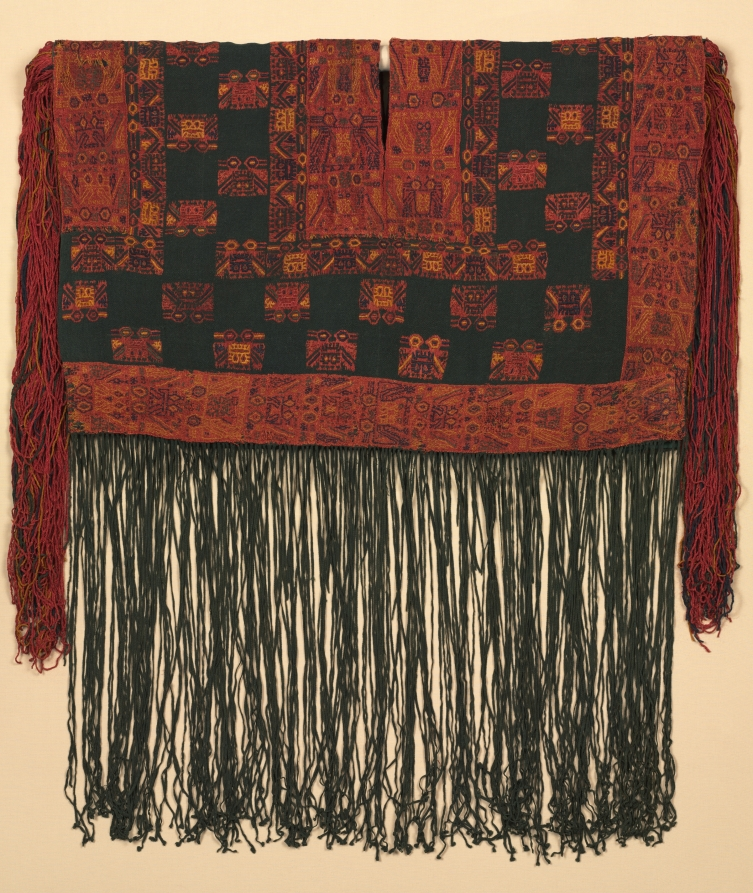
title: Tunic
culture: Peru, South Coast, Paracas (Cavernas) style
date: c. 300 BCE–200 CE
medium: Alpaca wool: plain weave with embroidery and warp substitution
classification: Textile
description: Brightly dyed wool yarns found in many ancient Peruvian textiles come mainly from alpacas that were domesticated and selectively bred to produce long, soft, lustrous fiber. The finely spun yarns in a broad range of colors as seen on this tunic—well preserved after approximately 2,000 years of burial—attest to the Paracas people’s considerable artistry. A double-headed bird motif appears multiple times throughout the tunic’s design.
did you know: Fine textiles were one of the most prestigious commodities in the ancient Andes.